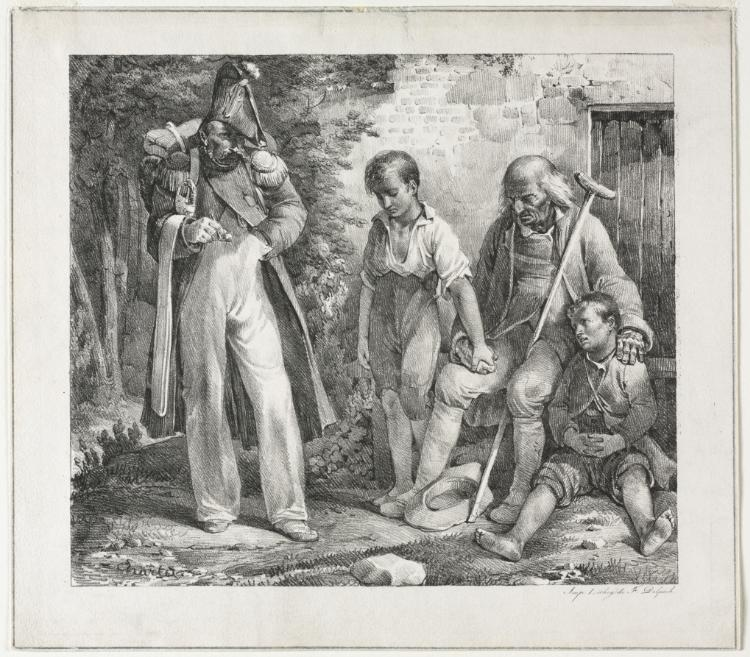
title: Begging for Alms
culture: France, 19th century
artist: Nicolas Toussaint Charlet (French, 1792–1845)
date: 1819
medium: lithograph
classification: Print